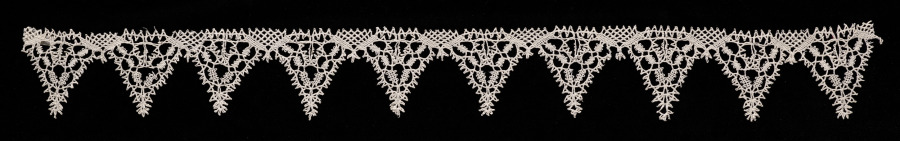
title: Lace Insertion and Edging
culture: Italy, Venice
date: 1540–60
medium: Bobbin lace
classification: Lace